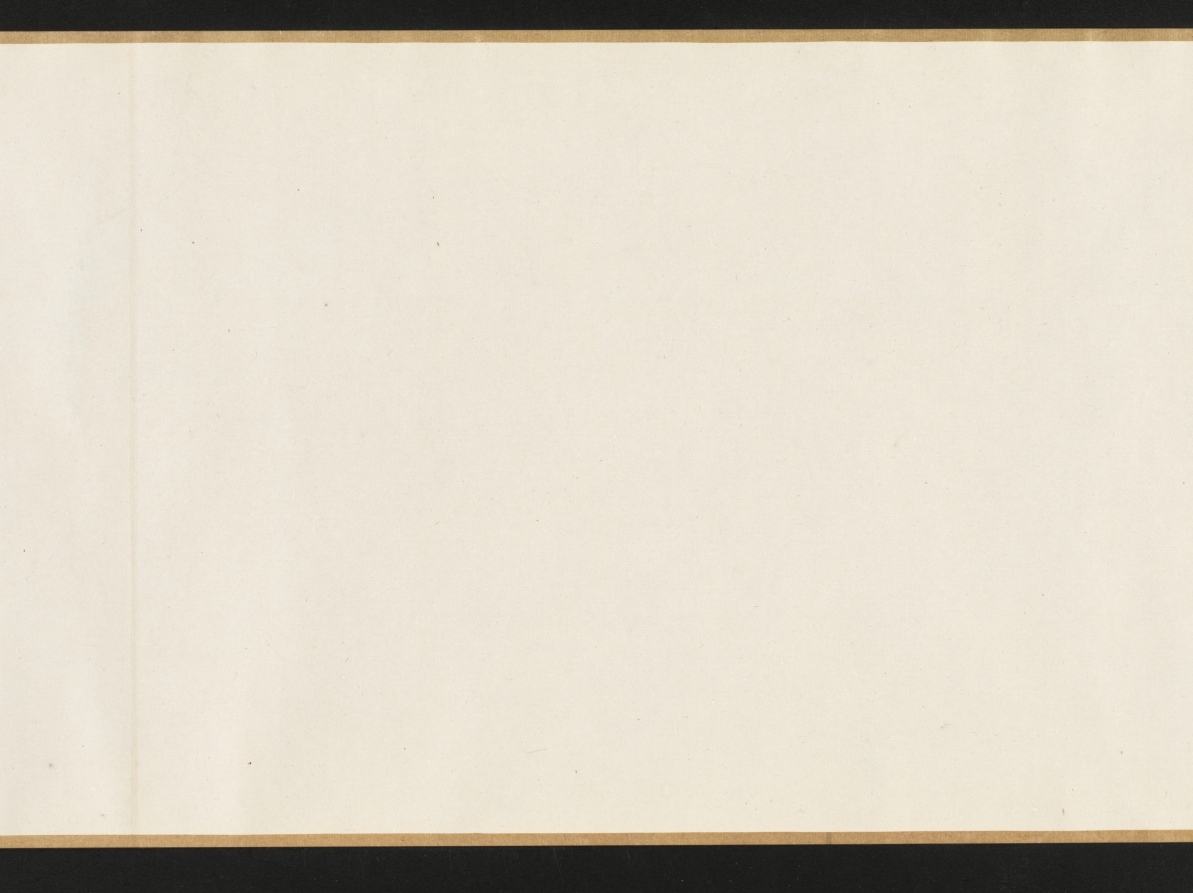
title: The Lantern Night Excursion of Zhong Kui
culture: China, Yuan dynasty (1271-1368)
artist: Yan Hui (Chinese, active 1270–1310)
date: late 1200s–early 1300s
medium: handscroll; ink and slight color on silk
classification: Painting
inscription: Artist's signature [and probable seal]: Yan Qiuyue 顏秋月 Title on frontispiece and 1 seal of Niu Shuyu 鈕樹玉 (1760–1827): Qiuyue mohuan 秋月墨幻 [Qiuyue's Ink Fantasy]. 31 additional seals: 2 of Yang Shiqi 楊士奇 (1365–1444); 2 of An Guo 安國 (1481–1534); 8 of Xiang Yuanbian 項元汴 (1525–1590); 2 of Geng Zhaozhong 耿昭忠 (1640–1686); 4 of Pu Tung 溥侗 (1870–1952); 7 of Tan Jing 譚敬 (1911–1991); 1 of Liu Ting-chih (20th c.); 5 unidentified.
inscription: An inscription by Zizhi Shanren 紫芝山人 [probably Jiang Hui 蔣惠], dated 1389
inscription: An inscription by Wu Kuan 吳寬 (1436–1504)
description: Here, the demon queller Zhong Kui leads a nightly procession of street entertainers with bare, muscular bodies and demonic faces. Some wear shabby clothes, and all perform stunts and tricks to astound and scare the viewer. In fact, a New Year custom in cities of southeast China had the poor, disguised as demons, process through the streets and play their tricks to clear households of evil spirits and welcome the spring. From right to left, a demonic figure leads the procession and beats a drum; another lifts a large rock; one stands on his hands trying to drink; one balances a jar on his elbow; three hold and wield weapons; one carries a folded chair covered by a cow’s skin; another holds Zhong Kui’s qin (zither), books, brush, and inkstone. At the end of the scroll, two figures offer a cup and bottle of wine to Zhong Kui, who lifts his hand in command.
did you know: Zhong Kui was an ancient ghostbuster.